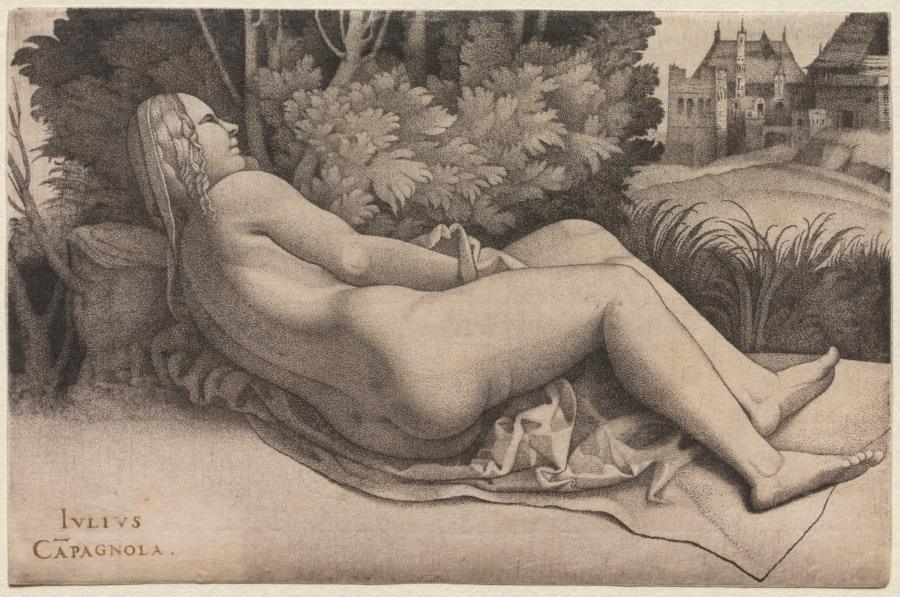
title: Venus Reclining in a Landscape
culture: Italy, late 15th-early 16th Century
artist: Giulio Campagnola (Italian, 1482–1515)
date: c. 1508–9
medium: engraving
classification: Print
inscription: Watermark: two crossed arrows (similar to Briquet 6270)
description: The Venetian artist Giulio Campagnola introduced the "dot manner," an engraving technique by which shading is created with dots and flicks produced with the point of the burin. This innovation allowed for a much greater range of tone and subtler gradations from dark to light. The effect imitated sfumato, a painting technique for creating soft atmospheric effects practiced by Venetian artists, such as Giorgione, at the time. The influence of and perhaps even the engraver’s collaboration with Giorgione is reflected in the extraordinary beauty and refinement of this rare early impression of Venus Reclining in a Landscape. The female nude reclining in a landscape was to become a distinctly Venetian subject in the 1500s.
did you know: This artist's training as a gem cutter prepared him well for the relatively new art of engraving, which required carving into a copperplate with a sharp instrument called a burin.